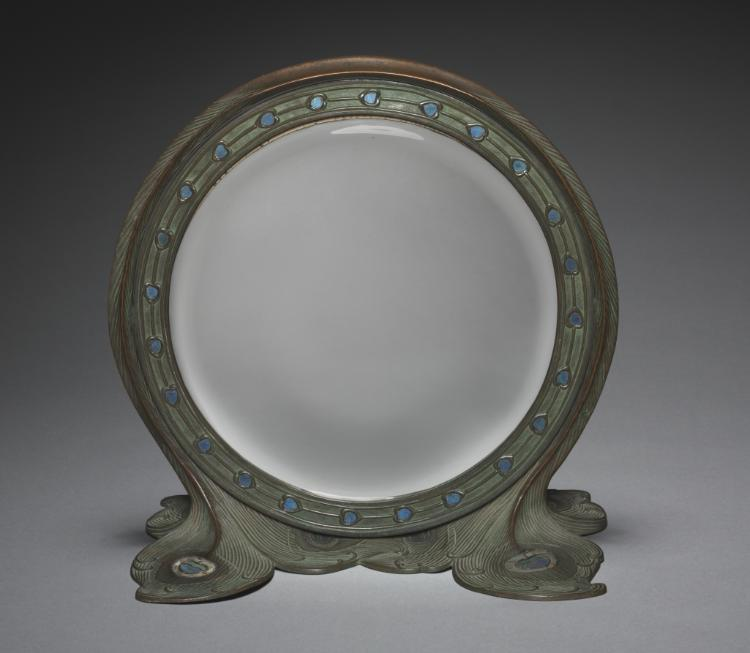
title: Dressing Table Mirror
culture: America, New York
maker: Tiffany Glass & Decorating Company (America, New York, 1892–1902)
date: c. 1900–1902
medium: bronze and Favrile glass mosaic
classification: Furniture and woodwork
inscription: stamped on underside: TGD Co. and illegible number [9292?]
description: By 1900 Louis Comfort Tiffany had expanded his empire by increasing the firm’s production of “fancy goods,” including inkstands, candlesticks, clocks, small boxes, desk sets, tea screens, and other functional objects, such as this dressing table mirror. These smaller, more affordable luxury items were designed with as much thought to artistry as the great stained glass windows and lamps through which the firm enjoyed unrivaled success.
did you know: The peacock, with its brilliantly colored iridescent plumage, was a favorite motif of Louis Comfort Tiffany, appearing in almost every genre of his artistic production.